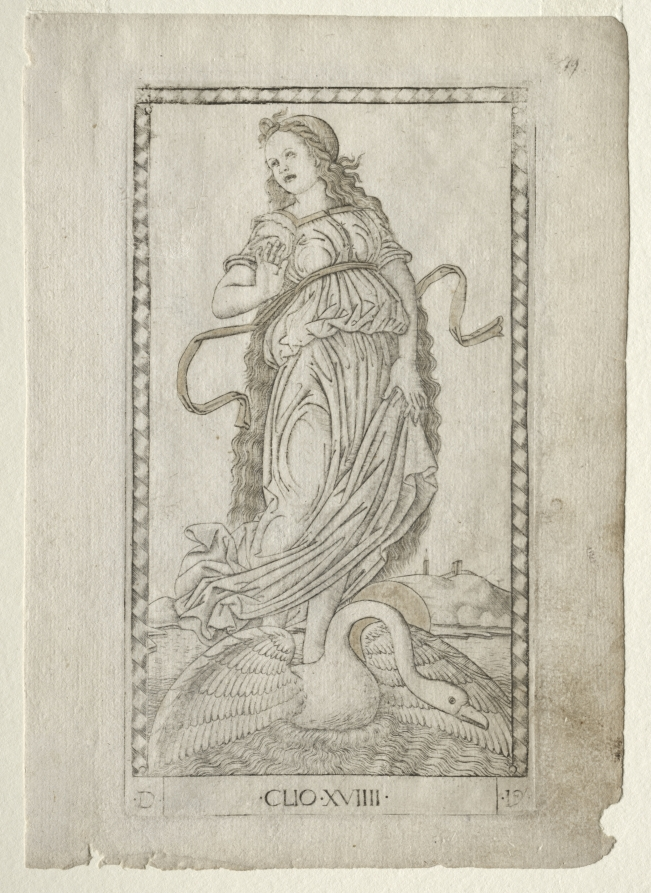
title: Clio (history) (from the Tarocchi series D: Apollo and the Muses, #19)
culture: Italy, Ferrara, 15th century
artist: Master of the E-Series Tarocchi (Italian, active 1460s)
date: before 1467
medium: engraving hand-colored with gold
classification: Print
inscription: Lettered below the image of Clio: ·D· / ·CLIO·XVIIII· / ·19·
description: This engraving is part of the Tarocchi group marked with the letter “D”, and named Apollo and the Muses. In Greek mythology, the nine Muses (Calliope, Urania, Terpsichore, Erato, Polyhymnia, Thalia, Melpomene, Euterpe, and Clio) were the daughters of Zeus, king of the gods, and Mnemosyne, the Titaness of memory. The Muses were goddesses presiding over different branches of the arts and sciences. Their leader and supervisor was Apollo, the god of light, music, prophecy, and poetry. Here, Clio is personified as a full-length female figure, turned to left, and standing on a swan in an imaginary sea landscape. Clio was regarded as the Muse of history.